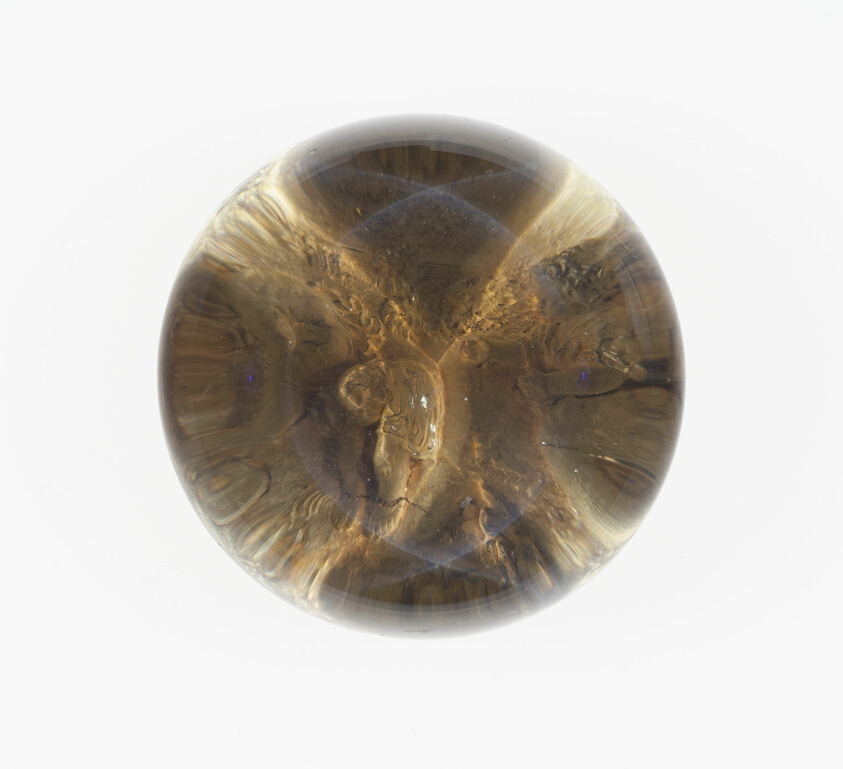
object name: Glass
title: Paperweight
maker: European, possibly English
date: c. 1848–60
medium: Glass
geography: England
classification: paperweight; glass